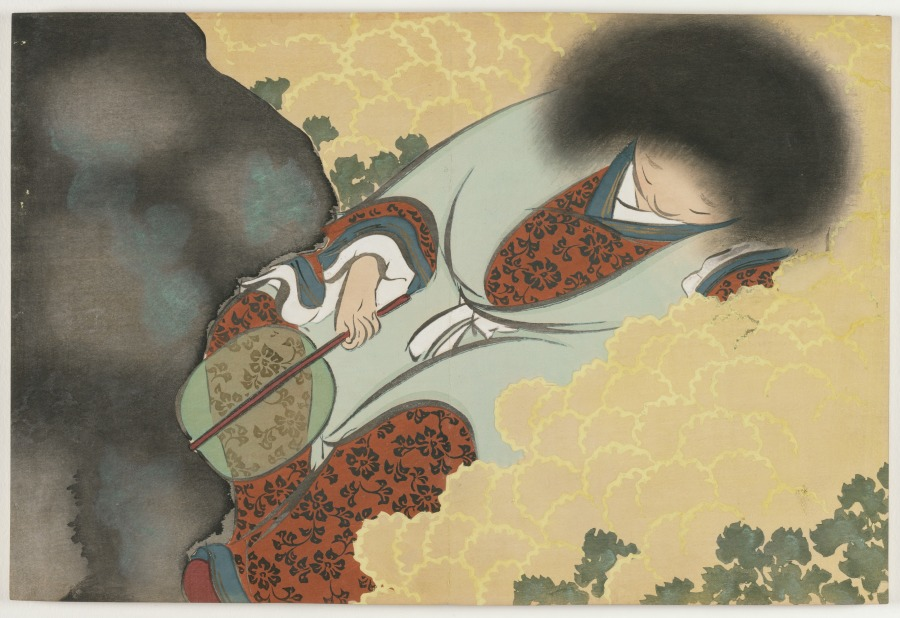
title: Flowers of a Hundred Worlds (Momoyogusa): Chrysanthemum Boy (Kikujidō)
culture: Japan, Meiji period (1868–1912)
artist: Kamisaka Sekka (Japanese, 1866–1942)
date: 1909–10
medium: color woodcuts with gold and silver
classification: Bound Volume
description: This print from a set of three woodblock printed albums displays the graphic design prowess of Kamisaka Sekka. The images were first distributed one by one to subscribers to the series but later were reissued in bound form, like this book, for mass consumers. Each print features a vignette taken from nature or Japanese literature. Many of the scenes have a long history in Japan, originating in the 900s or 1000s and having been interpreted by all manner of artists since that time. Sekka’s selections hew closely to precedents from the Rinpa style originated by painter Tawaraya Sōtatsu (c. 1570–c. 1640) and calligrapher Hon’ami Kōetsu (1558–1637).